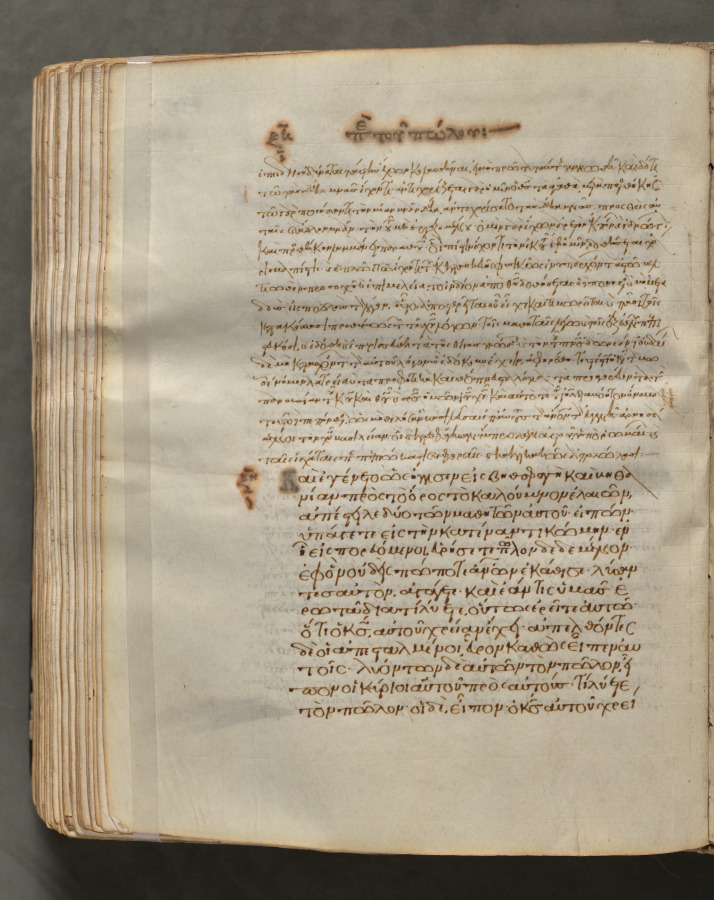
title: Text, folio 296 (verso), from a Gospel Book with Commentaries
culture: Byzantium, Constantinople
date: c. 1000–1100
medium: ink, tempera, and gold on vellum; leather binding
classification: Bound Volume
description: Each of the four gospels in this book opens on a page with brilliantly illuminated borders depicting the author of the text as well as birds—principally peacocks, symbols of the immortality of the soul—and fountains, representing the fountain of life and the salvation of the soul. This volume consists of 428 leaves with texts in Greek. Its level of sophistication suggests that it was probably written and decorated in a monastery in Constantinople.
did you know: Gospel books were carried in procession through Byzantine churches.